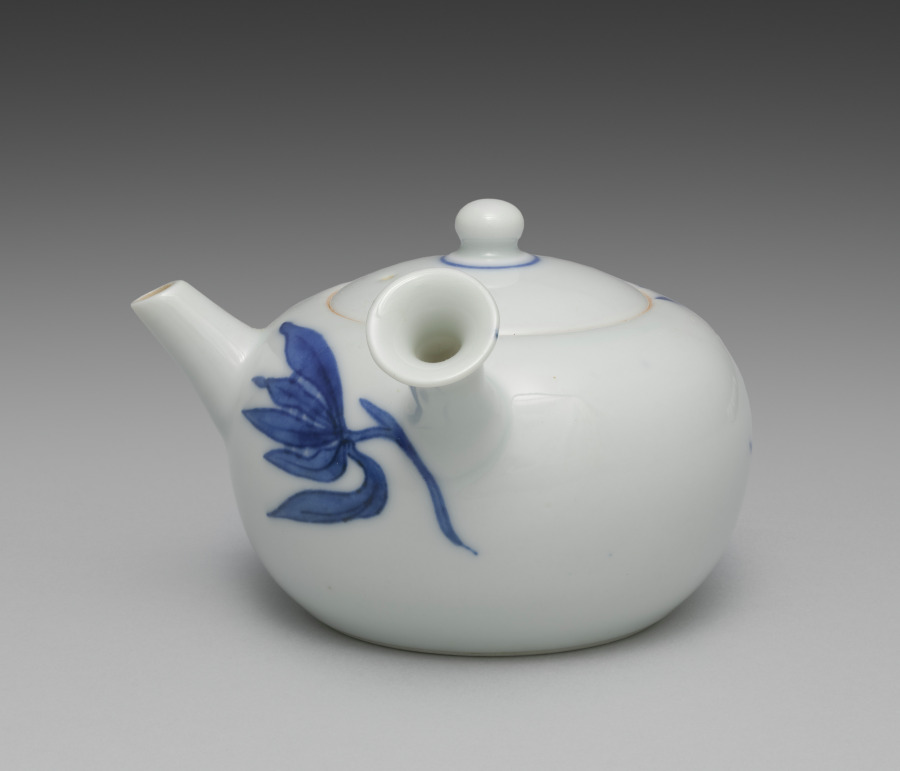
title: Teapot from Tea Set with Orchids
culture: Japan, Meiji period (1868–1912)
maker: Seifū Yohei III (Japanese, 1851–1914)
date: c. 1893–1914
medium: Porcelain with underglaze blue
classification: Ceramic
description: Although the teapot here is stored in a separate box from the five cups, these six pieces may once have been part of a tea set that included other tools such as a water cooler. The teacups have orchid flowers on both sides in underglaze blue, as well as a blue band inside the footring. The teapot has the same design and a blue band painted around the bottom of the lid’s knob. The cups’ long wood storage box is stamped on the exterior, over the lid and base, with a small red seal reading “Satō.” The same seal appears on five small squares of yellow textile, one placed in the bottom of each compartment in the teacup storage box. These are additional to the customary yellow cloths stamped with a “Seifu” seal. Interestingly, four of the Seifū cloths are stamped with an ovoid seal, while the remaining cloth, which is a slightly lighter color, has an unusual seal that is not quite gourd-shaped and with the fū of Seifū in a stylized, unrecognizable form. The teapot has its own box with a Satō seal and is wrapped with an orange textile stamped with the same unusual Seifū seal. A set with a very similar surface design is in the Brooklyn Museum. The Brooklyn set has a water cooler and a small pitcher, in addition to the teapot and cups, and all are in a single storage box. This box records the tea tools as made with kanpakuji, or “bright-jewel white porcelain,” counted among Yohei III’s most important inventions, and carved images. In fact, both sets have a white surface much closer in coloration to the cool white of porcelain clay used in Kyoto at the time, and the designs are simply painted. The Brooklyn set was thus likely mismatched at some point with a box intended for another tea set. Nonetheless, the box may have helped prevent the set’s original components from being dispersed, and the set itself provides insight into how the other tools from the present set may have looked.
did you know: This tea set with orchids has a side-handled pot called a kyūsu, used for steeping, straining, and serving tea.